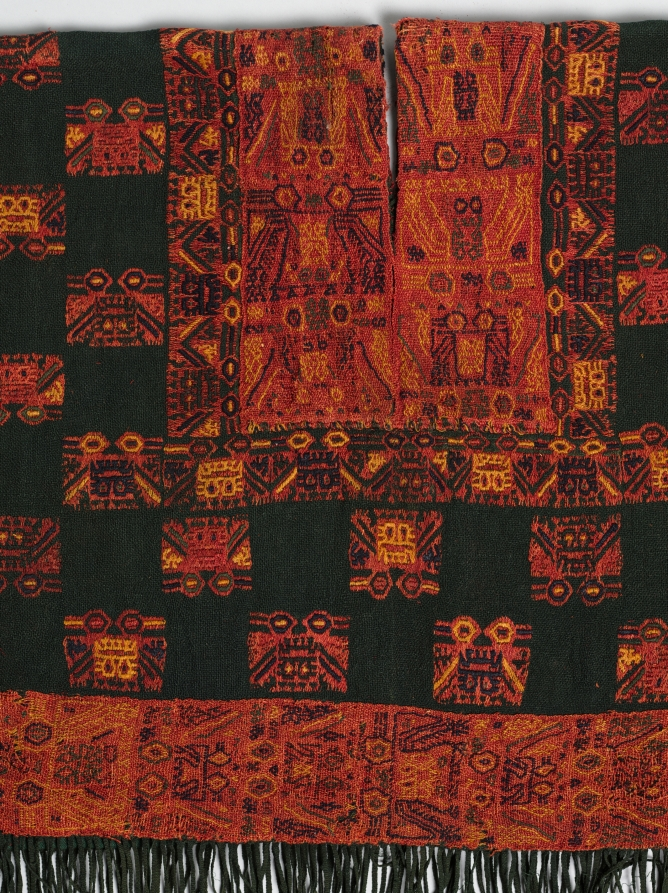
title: Tunic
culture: Peru, South Coast, Paracas (Cavernas) style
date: c. 300 BCE–200 CE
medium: Alpaca wool: plain weave with embroidery and warp substitution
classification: Textile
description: Brightly dyed wool yarns found in many ancient Peruvian textiles come mainly from alpacas that were domesticated and selectively bred to produce long, soft, lustrous fiber. The finely spun yarns in a broad range of colors as seen on this tunic—well preserved after approximately 2,000 years of burial—attest to the Paracas people’s considerable artistry. A double-headed bird motif appears multiple times throughout the tunic’s design.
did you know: Fine textiles were one of the most prestigious commodities in the ancient Andes.